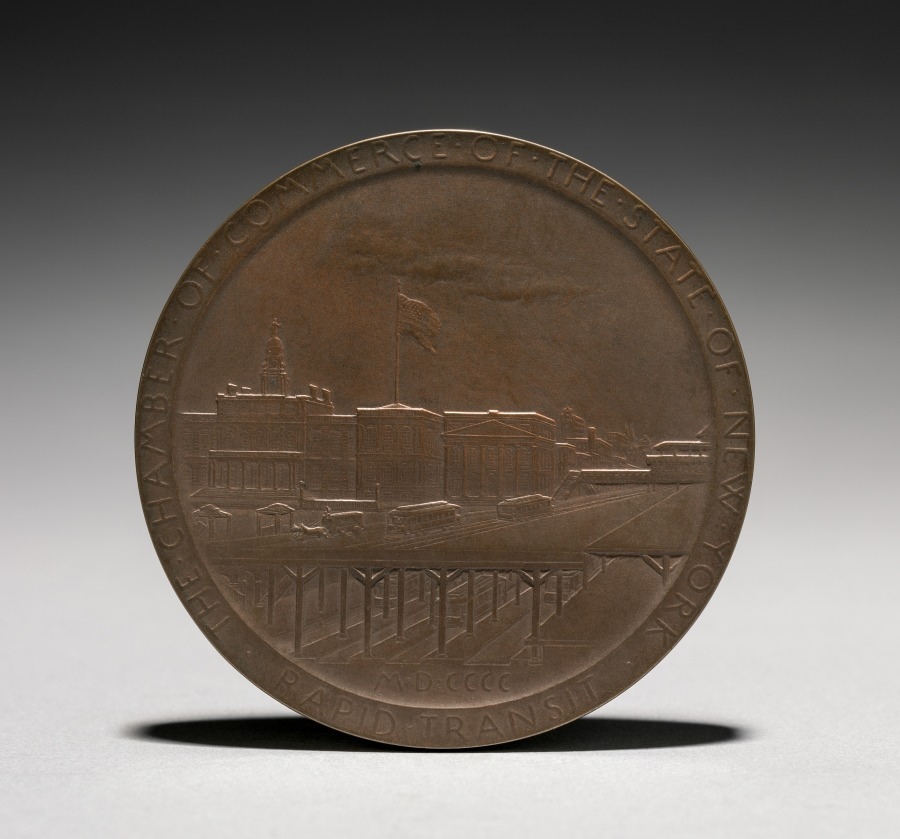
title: Medal: Abram Stevens Hewitt (reverse)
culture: France, late 19th-early 20th century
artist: Louis-Oscar Roty (French, 1846–1911)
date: 1875–1925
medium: bronze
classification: Metalwork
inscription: band of lettering around edge: "RAPID TRANSIT -- THE CHAMBER OF COMMERCE OF THE STATE OF NEW YORK, MDCCCC. On edge: "Tiffany & Co."